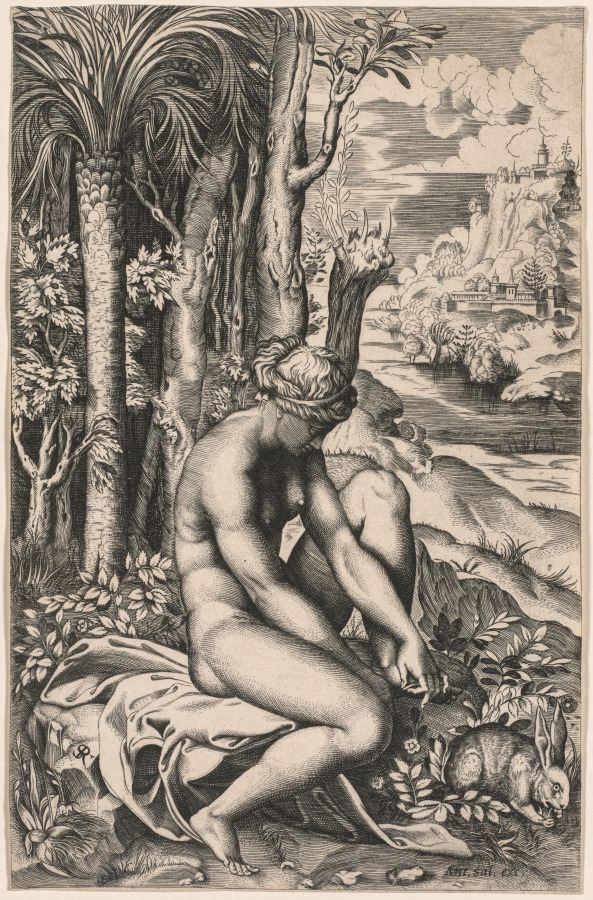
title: Venus Wounded by a Rose's Thorn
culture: Italy, 16th century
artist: Marco Dente (Italian, c. 1486–1527)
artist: after Raphael (Italian, 1483–1520)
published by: Antonio Salamanca (c.1500–1562)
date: c. 1516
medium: engraving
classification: Print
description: This composition alludes to The Lament for Adonis by the Greek poet Bion (active about 100 BCE). In the poem, Venus, distraught by the death of her lover Adonis, wanders barefoot in the woods and is wounded by brambles. Although Bion implores Venus to “weep no longer in the thickets,” the poem does not describe the moment depicted here when she plucks a thorn from her foot, imaginatively conceived as a vehicle to present a classical female nude. The wide-eyed hare near Venus is an ancient symbol of fertility and sexual desire.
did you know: The story featured here has been used to explain why some roses are red: they were stained with the blood of Venus after she pricked herself while walking in the forest.